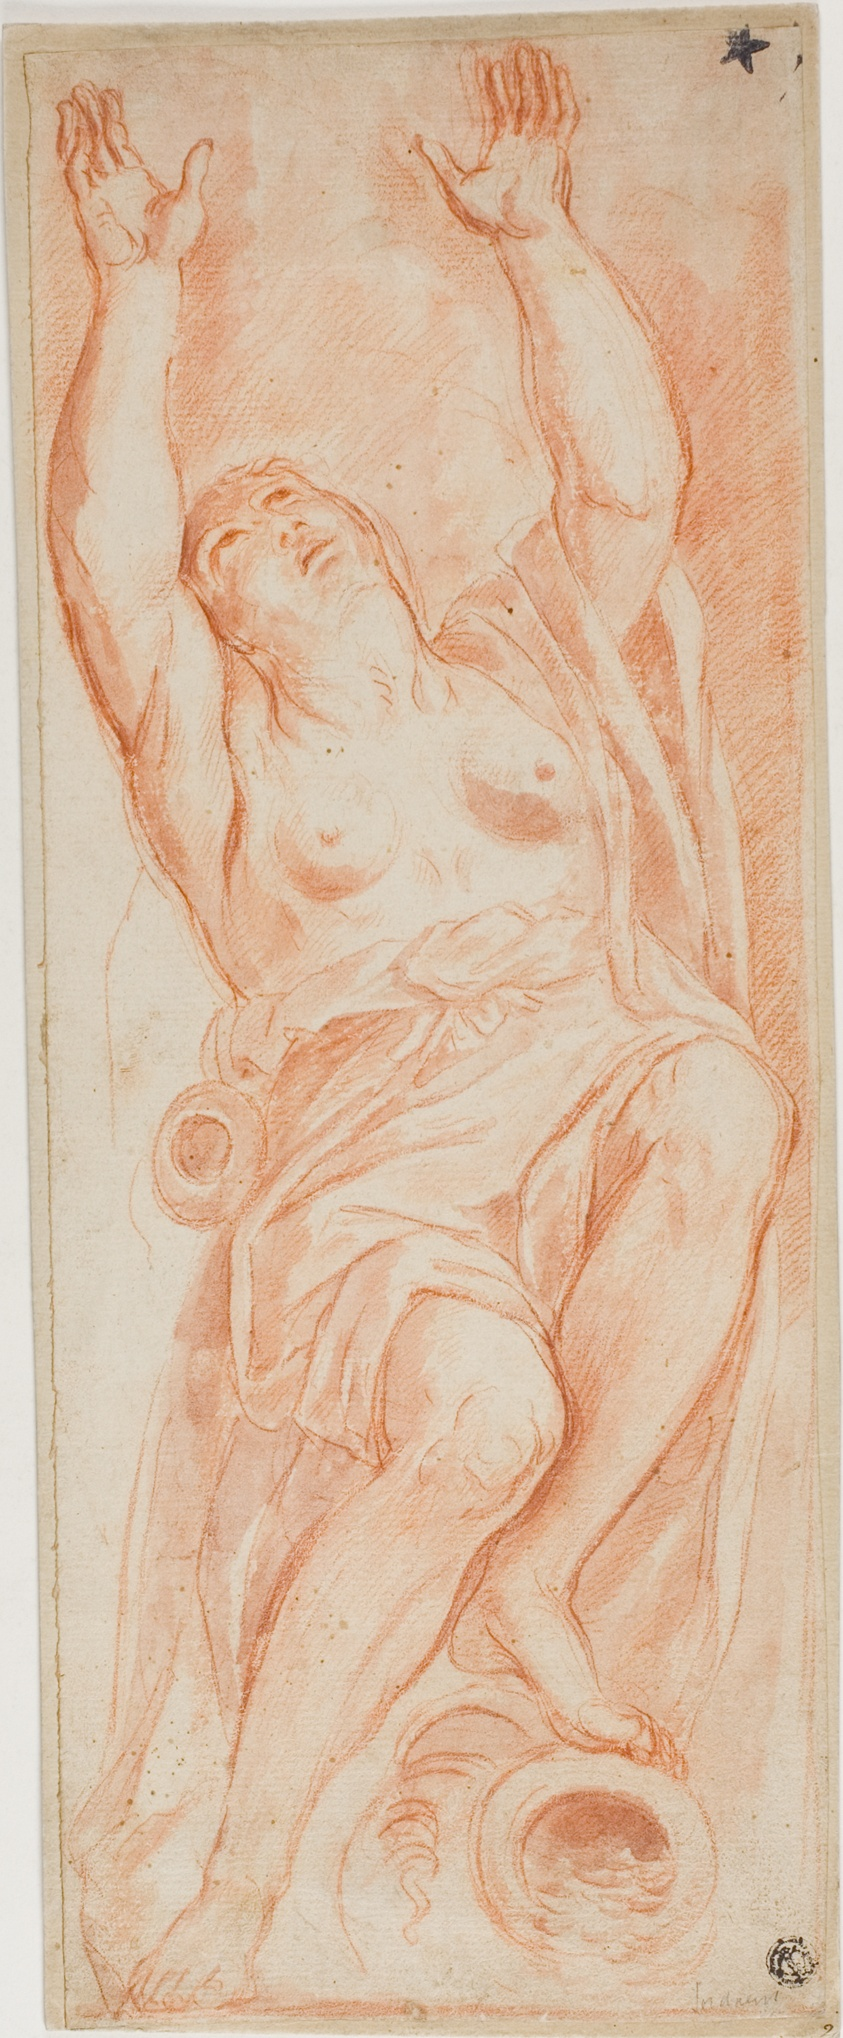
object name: Drawing and Watercolor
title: Voluntary Poverty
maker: After Domenichino; Italian, 1581-1641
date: after 1627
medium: Red chalk, with brush and brown wash and red chalk wash, on ivory laid paper, laid down on board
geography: Italy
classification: chalk; drawings (visual works); prints and drawing